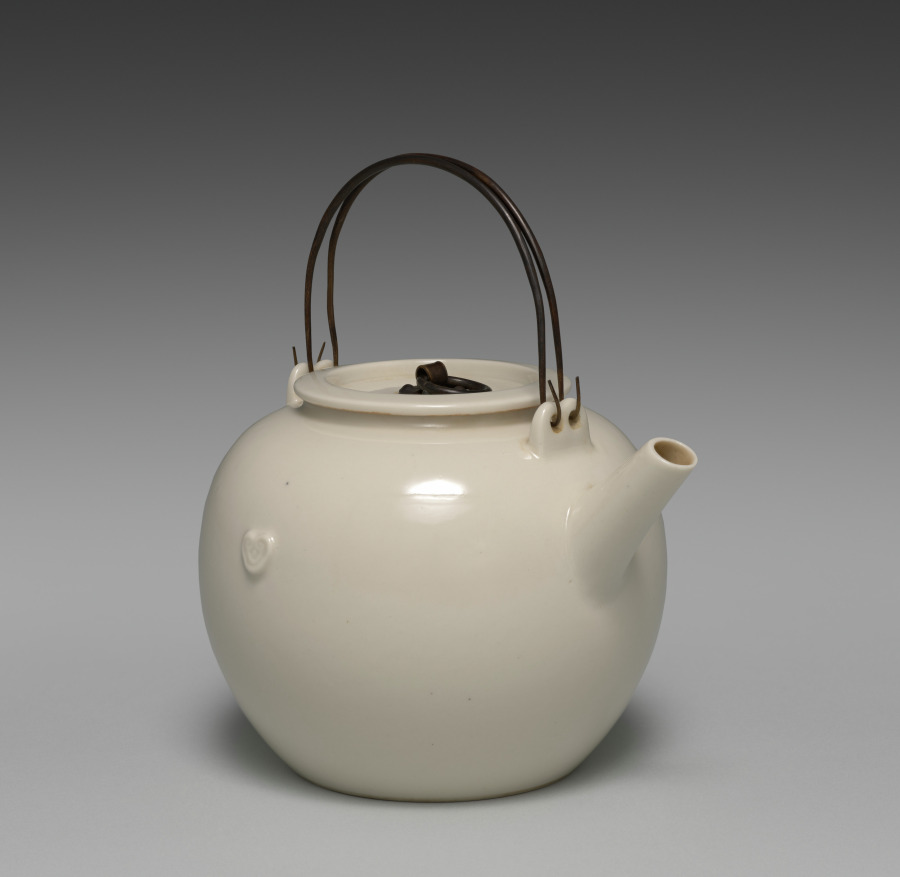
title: Teapot with Ruyi Motifs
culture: Japan, Meiji period (1868–1912)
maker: Seifū Yohei III (Japanese, 1851–1914)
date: 1893–1914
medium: Porcelain with molded design and iron handles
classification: Ceramic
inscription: The base of the pot has a “Seifu” seal.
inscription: Inscription on the box dated to 1960.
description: The simple, round form of this teapot is embellished with only a pair of nyoi staff-head motifs, one on each side. Two arched iron handles, parallel to each other, are hooked through holes in raised tabs at the front and back of the shoulders of the pot. The round lid is depressed so that an iron ring handle fastened with an iron clamp passing through the lid can lie flat inside the recessed area. The box is not original to the piece and has an inscription dated to 1960. The person who wrote it clearly admired Yohei III and his efforts to produce works that resembled Chinese ceramics. The inscription describes Yohei’s journey to perfecting these copies but misidentified the Chinese kiln whose wares were the basis for this particular work.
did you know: The base of the pot has a “Seifu” seal.